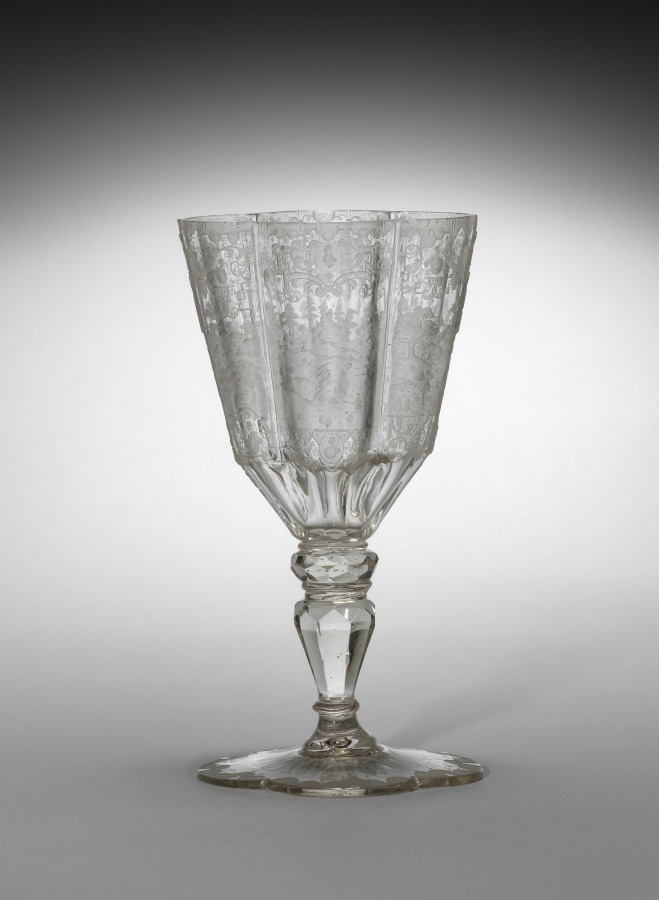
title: Standing Cup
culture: Germany, Silesia, 18th century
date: c. 1725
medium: glass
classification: Glass